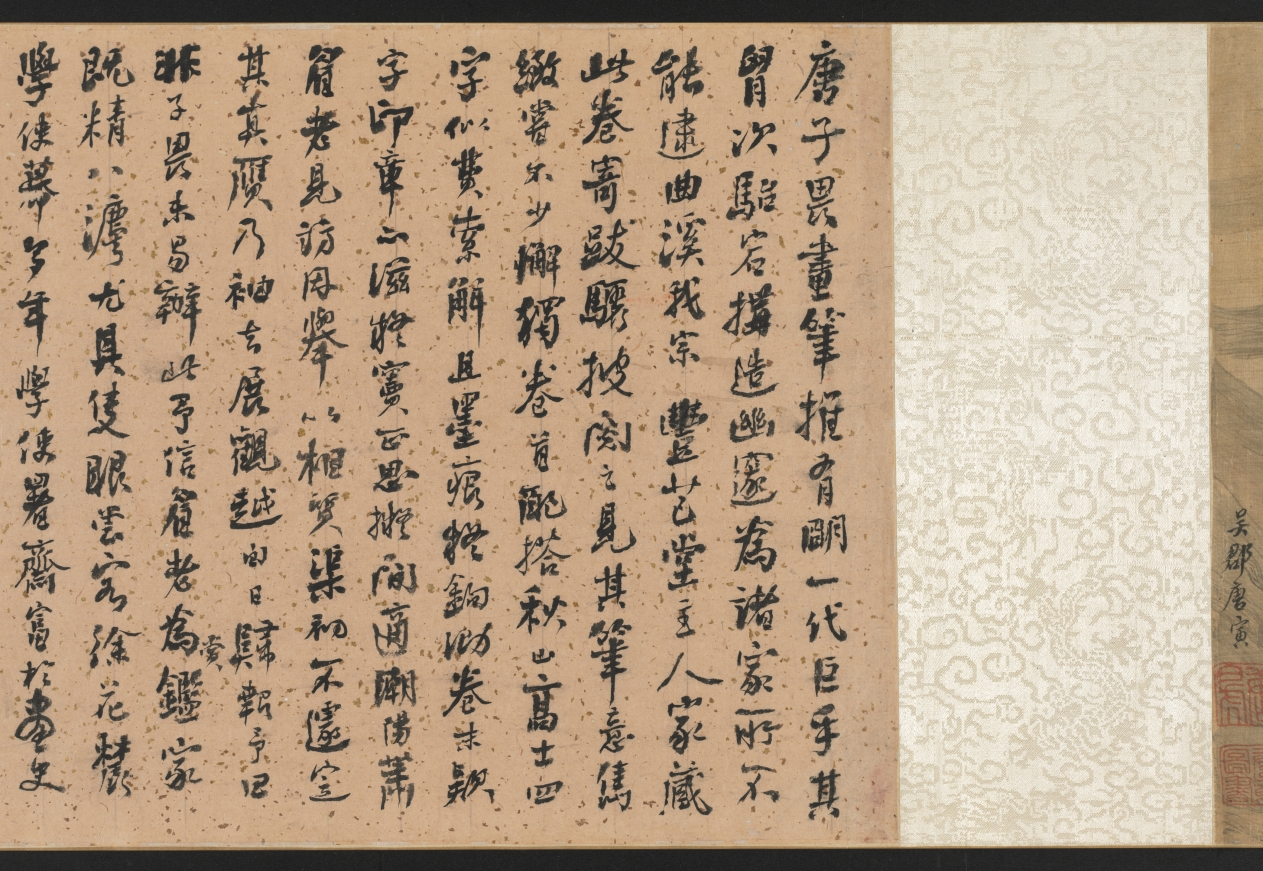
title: Scholar-Hermits in the Autumn Mountains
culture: China, Ming dynasty (1368–1644)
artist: Tang Yin (Chinese, 1470–1523)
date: 1500–1510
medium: handscroll, ink and light color on silk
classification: Painting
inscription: Artist's signature and 2 seals at end of scroll: Tang Yin [seals] T'ang Po-hu; T'ang Tzu'wei t'u-shu.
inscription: Title on frontispiece by Li Cho-kung (dates unknown).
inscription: 1 colophon and 11 additional seals: 1 colophon dated 1915 of Wu Tso-hsi (19th-20th c.); 2 seals of Gao Qifeng 高奇峰 (1889–1933); 5 seals of C. C. Wang 王季遷 (1907–2003); 4 seals unidentified.